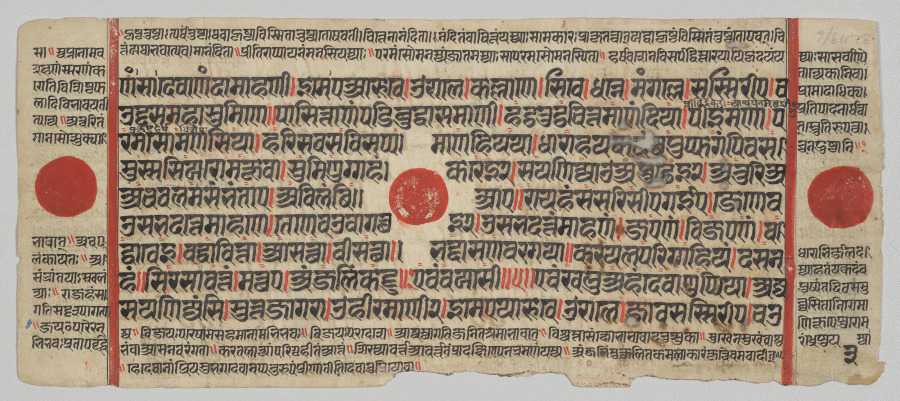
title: Text, Folio 3 (verso), from a Kalpa-sutra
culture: Western India, Gujarat, last quarter of the 15th century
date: c. 1475–1500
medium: Gum tempera, ink, and gold on paper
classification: Painting